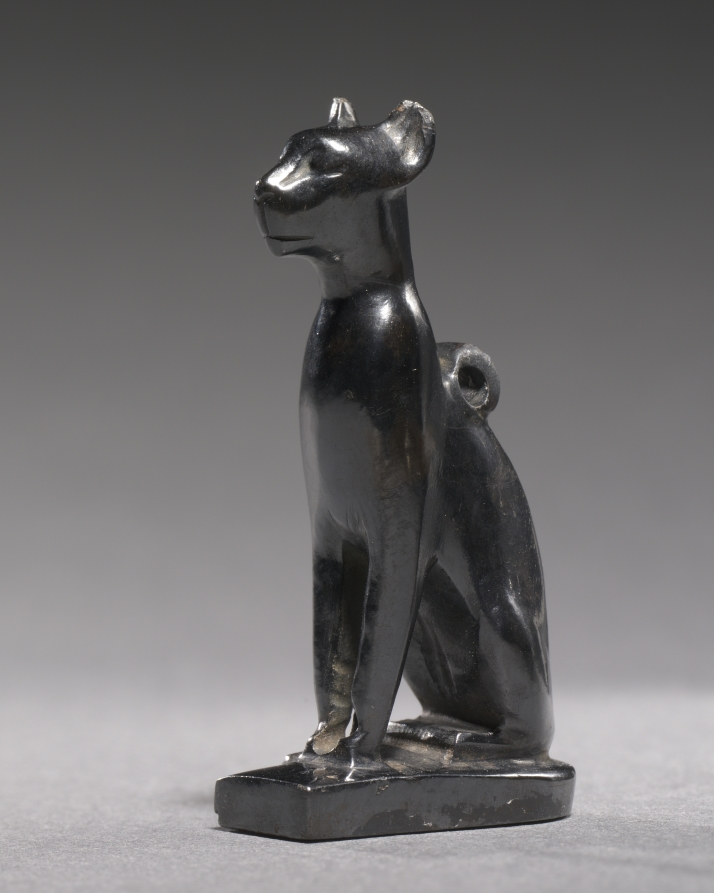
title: Amulet of Bastet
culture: Egypt, Third Intermediate (1069–715 BCE)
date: c. 1069–715 BCE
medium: hematite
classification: Amulets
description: Elegantly seated on a low base, its tail curled around its left side, this tiny cat, sacred animal of the goddess Bastet, is a sculptural tour de force. The front legs are carved entirely in openwork. The base, an amalgam of the hieroglyphs for "ointment jar" (also used in the writing the name of the goddess Bastet), and "protection" is admirably contoured to the animal's body. On the back is a loop for suspension.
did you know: This object was in the collection of Howard Carter—the man who discovered the intact tomb of Tutankhamun—until his death.